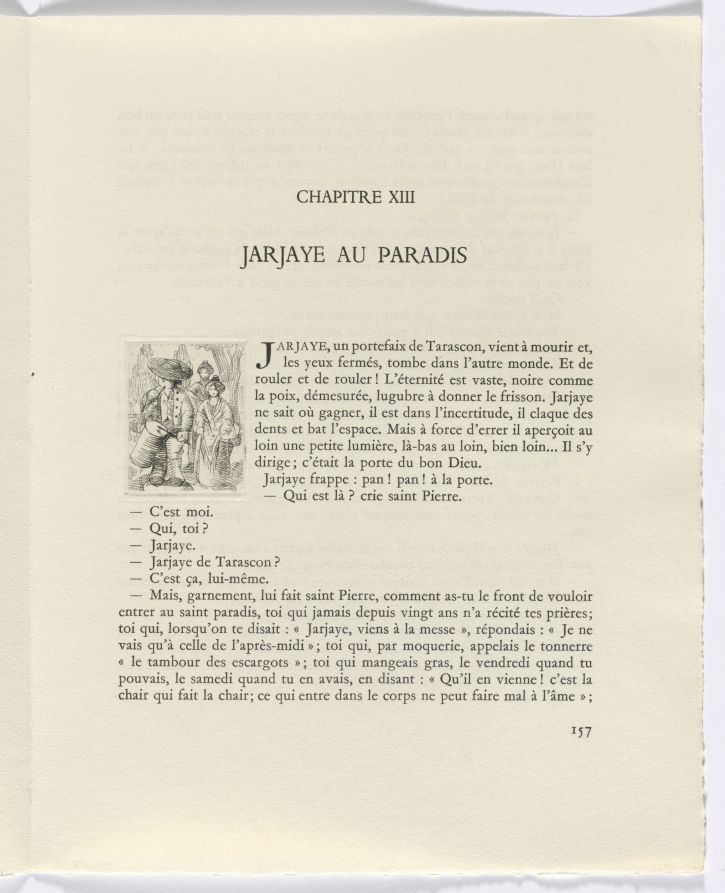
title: Frédéric Mistral: Mémoires et Recits by Frédéric Mistral: man playing drum (page 157)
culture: France, 20th century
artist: Auguste Brouet (French, 1872–1941)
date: 1937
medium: etchings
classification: Portfolio